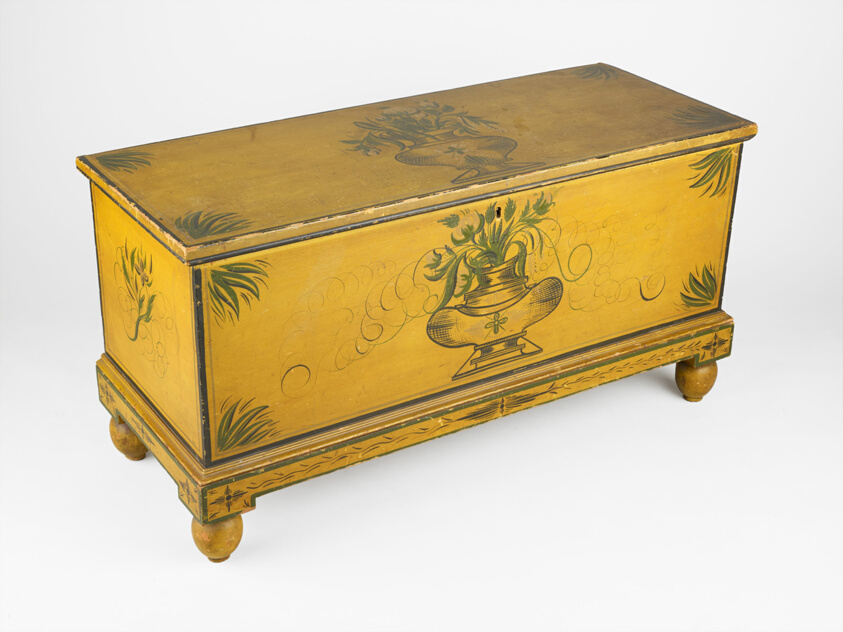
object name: Furniture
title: Chest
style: Folk Art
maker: Artist unknown (American, 19th century); New England, possibly Connecticut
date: c. 1830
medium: Painted white pine and oak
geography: New England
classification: case furniture; furniture; american decorative arts; american arts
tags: furniture